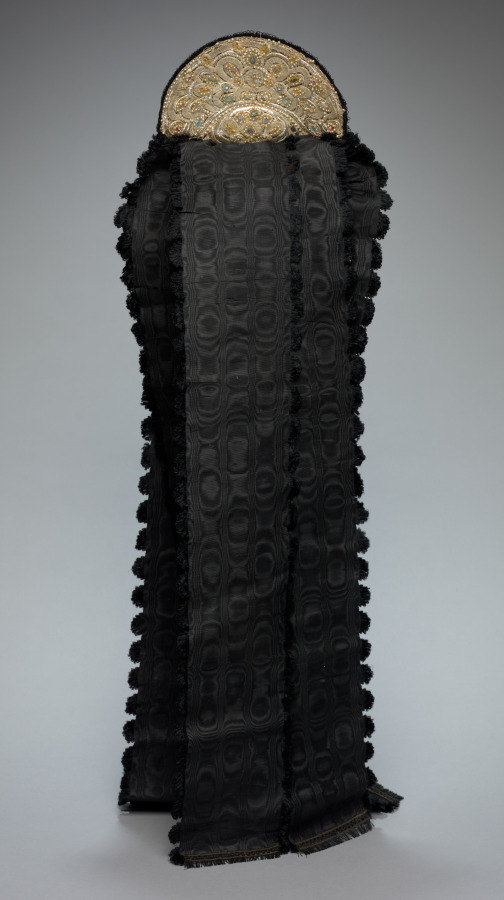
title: Headdress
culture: Germany, Swabia, 18th century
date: 1700s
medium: embroidery, decorated with silver thread, imitation pearls, colored stones, and streamers of moiré ribbon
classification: Garment